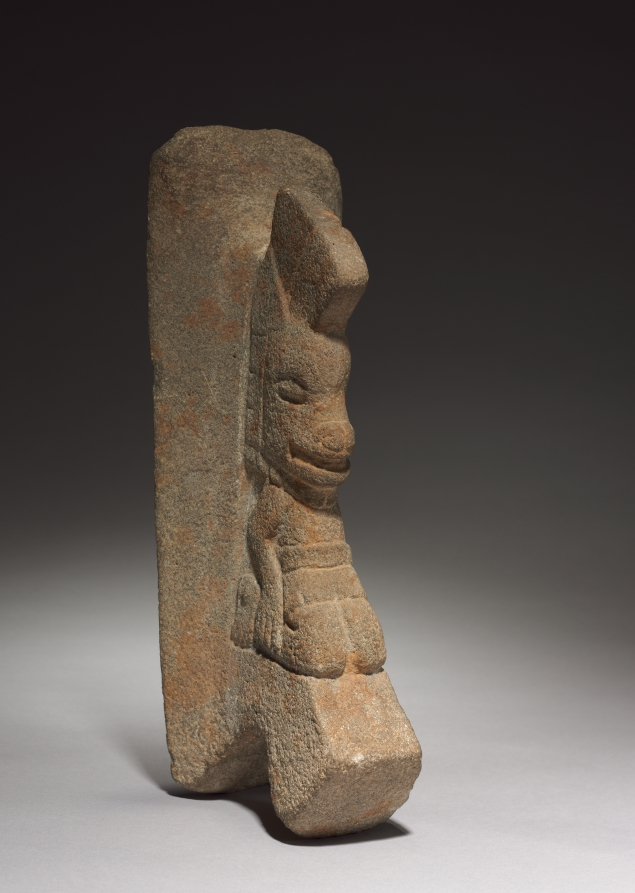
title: Animal Palma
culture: Mexico, Veracruz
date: 600–1000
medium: gray volcanic stone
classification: Sculpture